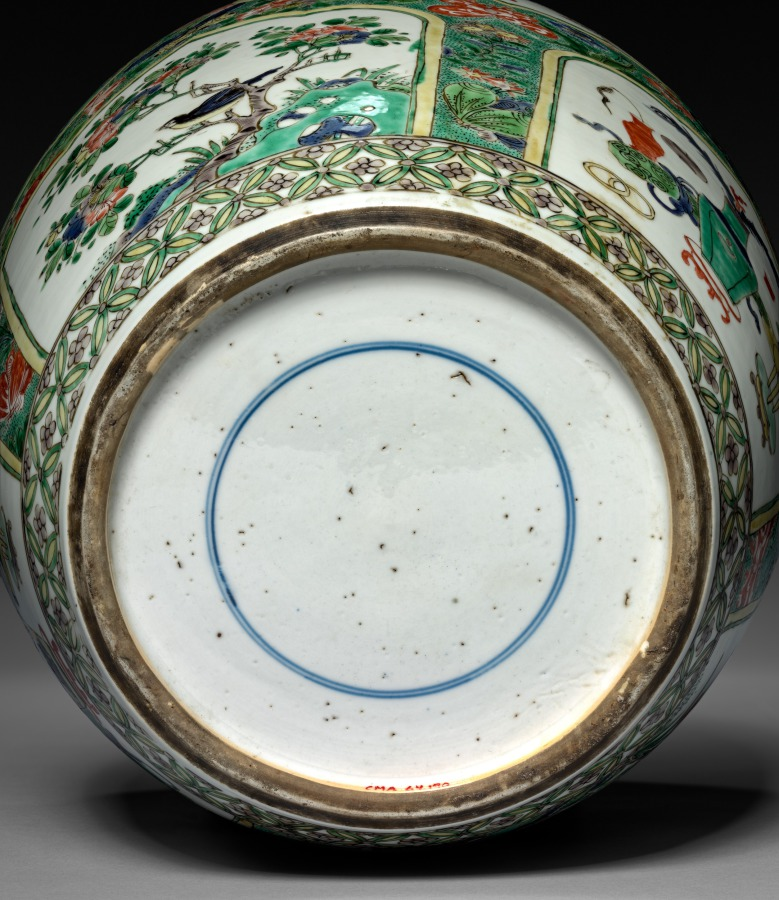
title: Vase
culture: China, Qing dynasty (1644-1911), Kangxi reign (1661-1722)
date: 1622–1722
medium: porcelain with underglaze decoration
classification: Ceramic